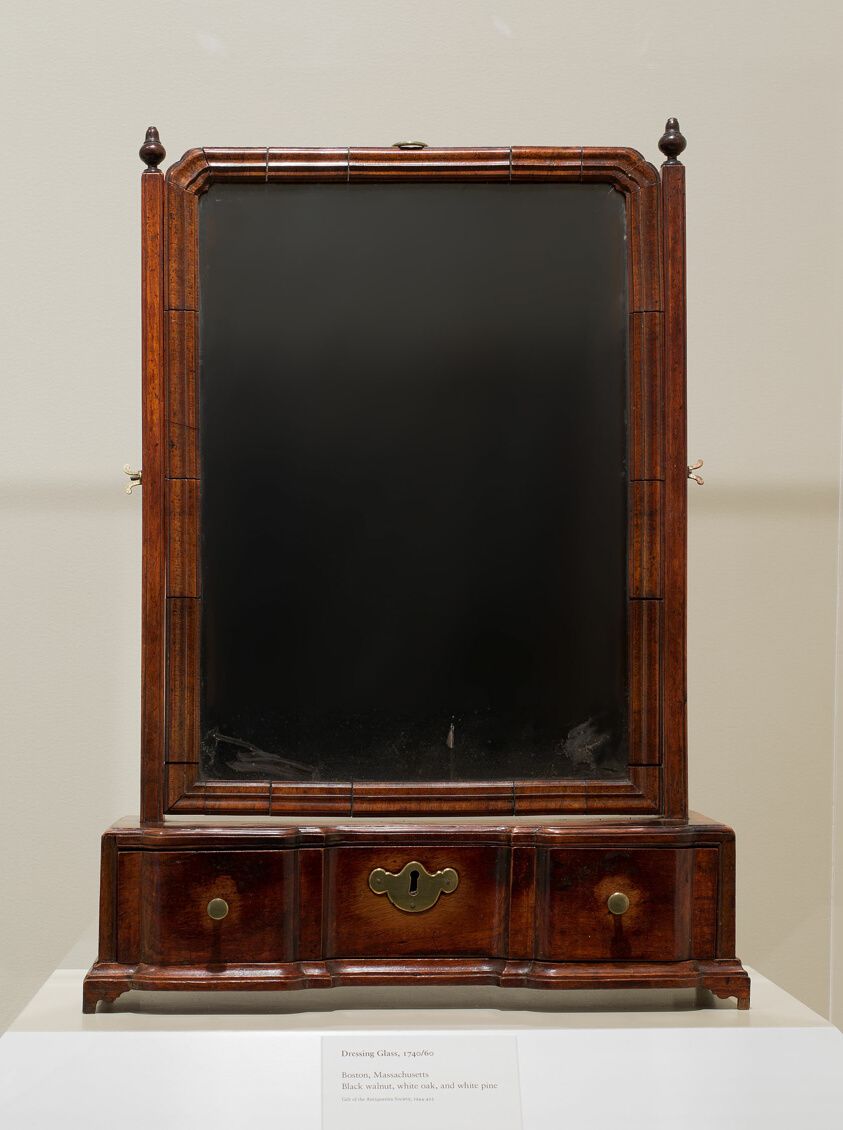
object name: Furniture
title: Dressing Glass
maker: Artist unknown (American, 18th century); Boston area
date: 1740–60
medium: Black walnut, white oak, and white pine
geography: Boston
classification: furniture accessory; american decorative arts; american arts; furniture